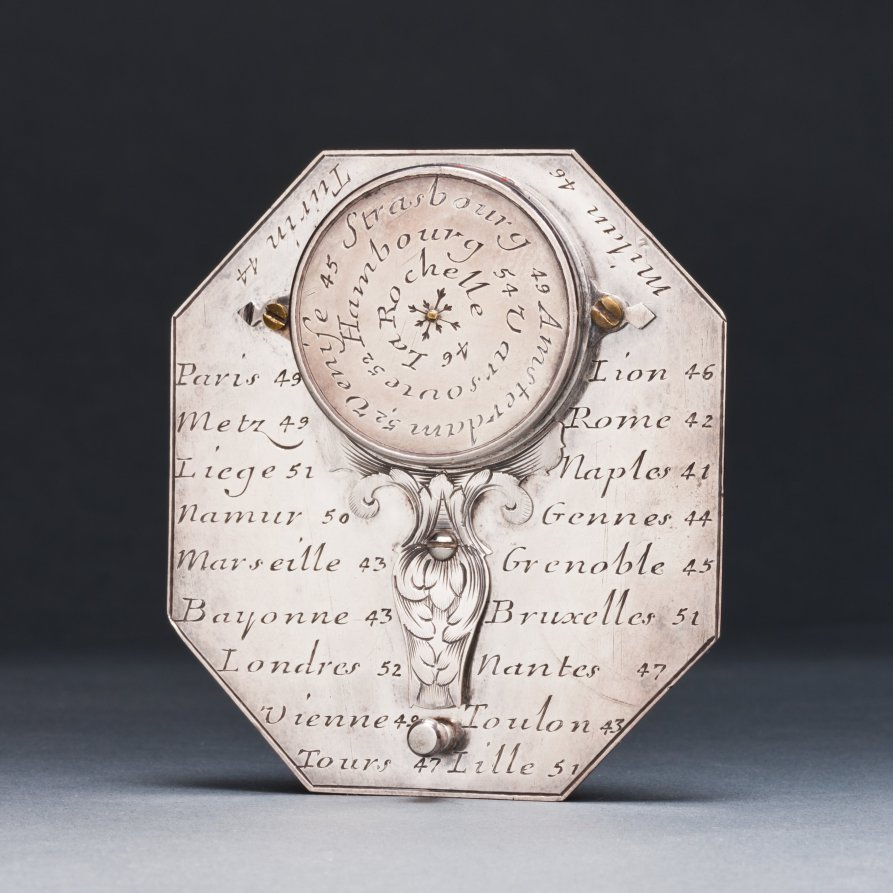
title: Butterfield Sundial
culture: France, 18th century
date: 1700s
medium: silver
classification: Silver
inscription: [Engraved signature above the compass in ribbon band]: "N. BION A Paris"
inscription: [Engraved on the face of the sundial]: “Pour 55° 4-5-6-7-8-9-10-11 50° IIII-V-VI-VII-VIII-IX-X-XI 45° 5-6-7-8-9-10-11 40° -VI-VII-VIII-IX-X-XI'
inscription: [Engraved on the other side]: "Pour 55° -8-7-6-5-4-3-2-1-0 50°-VIII-VII-VI-V-IIII-III-II-I 45°-8-7-6-5-4-3-2-1 40°-VII-VI-V-IIII-III-II-I"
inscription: [Engraved around the compass]: “NORD-OUEST-SUD-EST”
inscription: [Engraved on the back of the sundial]: “Turin 44 Milan 46 Paris 49 Lion 46 Metz 49 Rome 42 Liege 51 Naples 44 Namur 50 Gennes 44 Marseille 43 Grenoble 45 Bayonne 43 Bruxelle 51 Londres 52 Nantes 47 Vienne 48 Toulon 43 Tours 47 Lille 51”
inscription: [Engraved around the back of the compass]: “Venise 45 Strasbourg 49 Amsterdam 52 Hambourg 54 Varsovie 52 La Rochelle 46”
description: Butterfield-type sundials are characterized by their adjustable gnomons, metal flaps that cast a shadow on the dial’s face to indicate the hour, and geographical indices. This sundial has a scale adjustable between latitudes of 40° to 60° north. The latitudes of 26 European towns are engraved on its back for quick reference. With an intricately engraved silver face, it would have functioned as a fashionable traveler’s accessory.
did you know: Butterfield-style sundials were named after Micheal Butterfield, an English scientific and mathematical instrument maker who worked in Paris between 1674 and 1724.